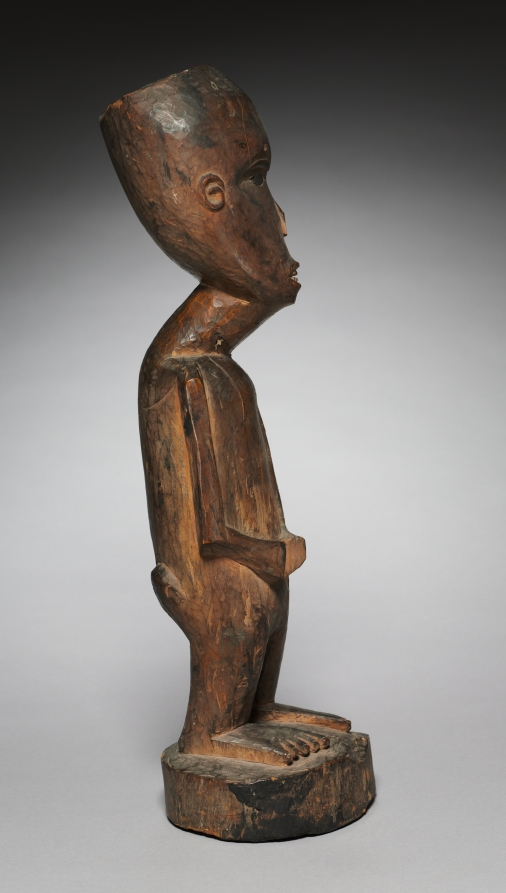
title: Male Figure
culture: Central Africa, Democratic Republic of the Congo, Kongo or Vili, early 19th century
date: early 1800s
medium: Wood, iron, and metalized glass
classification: Sculpture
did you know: This work has a paper label indicating it was exhibited in the 1857 Art Treasures of Great Britain in Manchester, England.